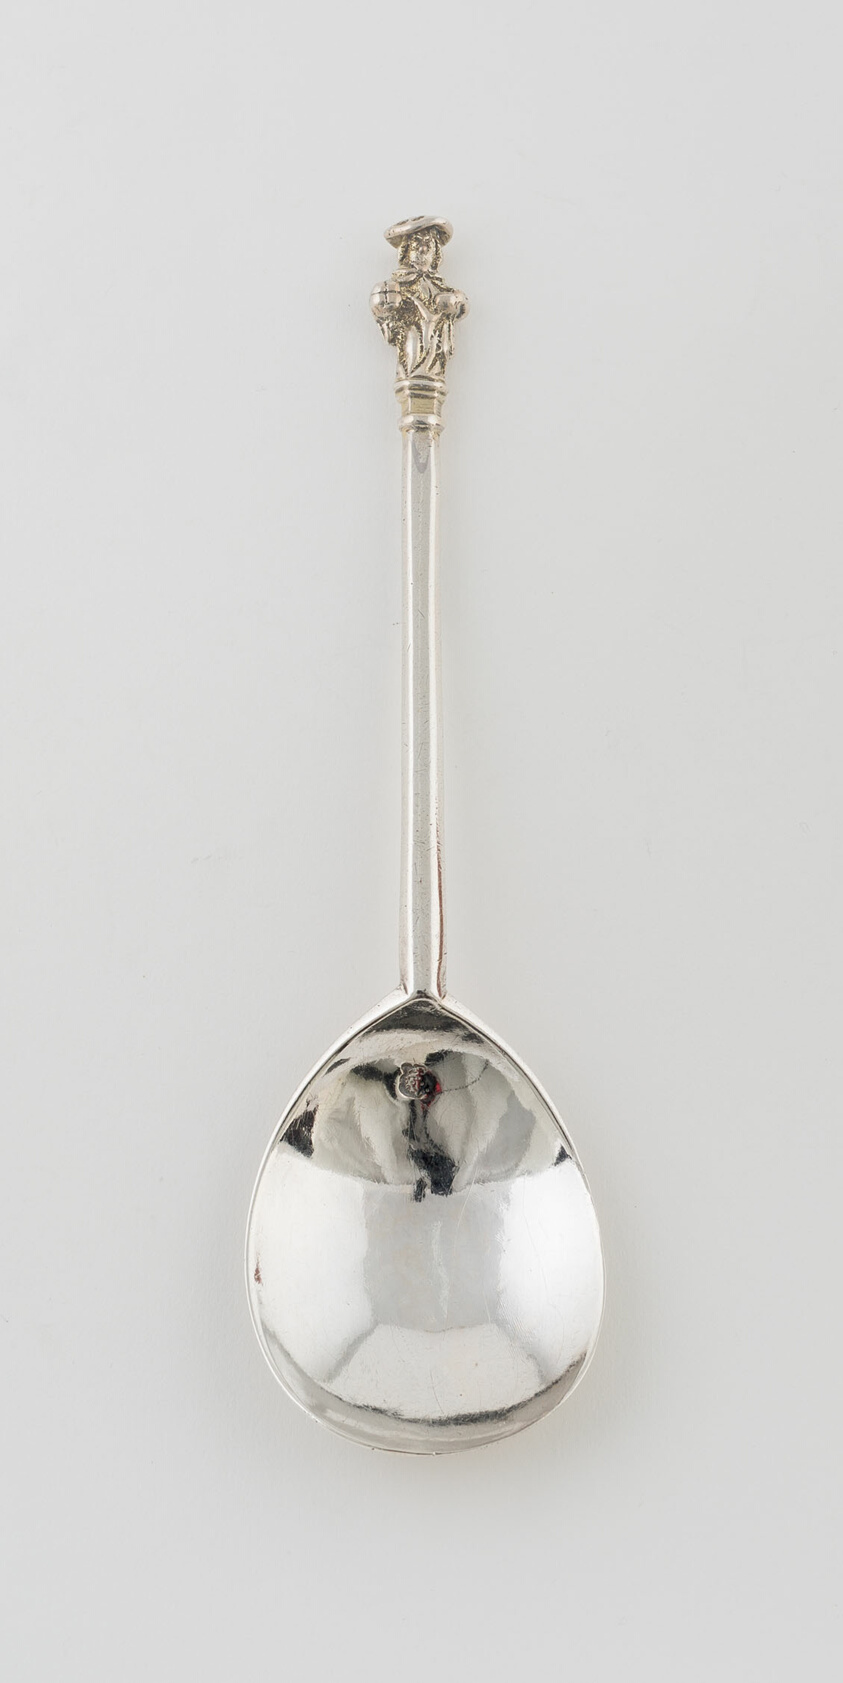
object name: Metalwork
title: Apostle Spoon: St. Matthew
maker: London, England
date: 1602/03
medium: Silver; figure gilded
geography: London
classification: silver; metalwork; european decorative arts